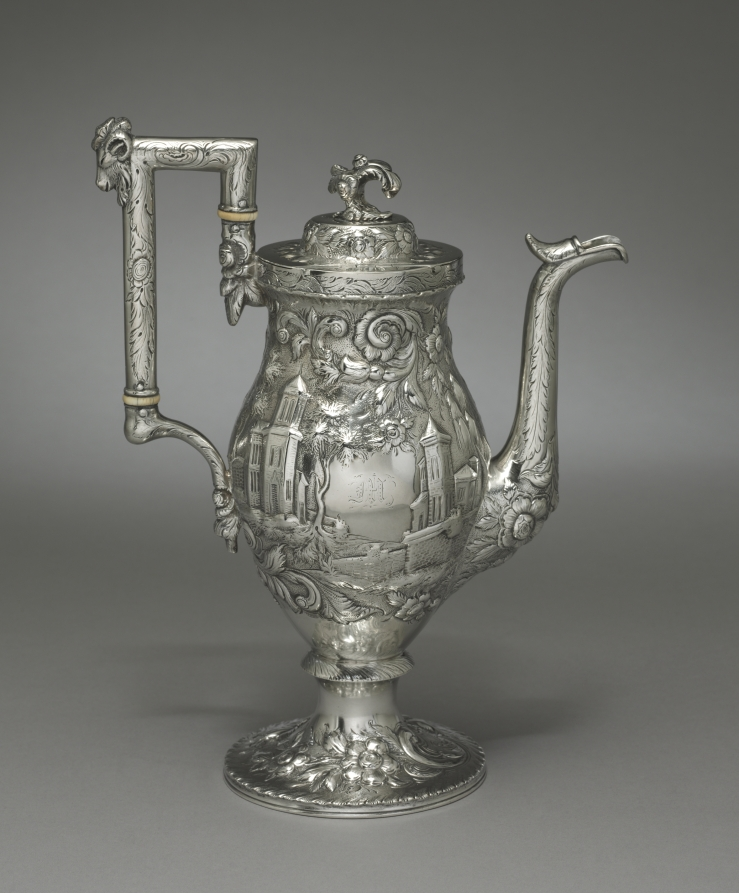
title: Neo-Rococo Coffee Pot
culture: America, Baltimore, 19th century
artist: Samuel Kirk (American, 1793–1872)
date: c. 1840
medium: silver and ivory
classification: Silver